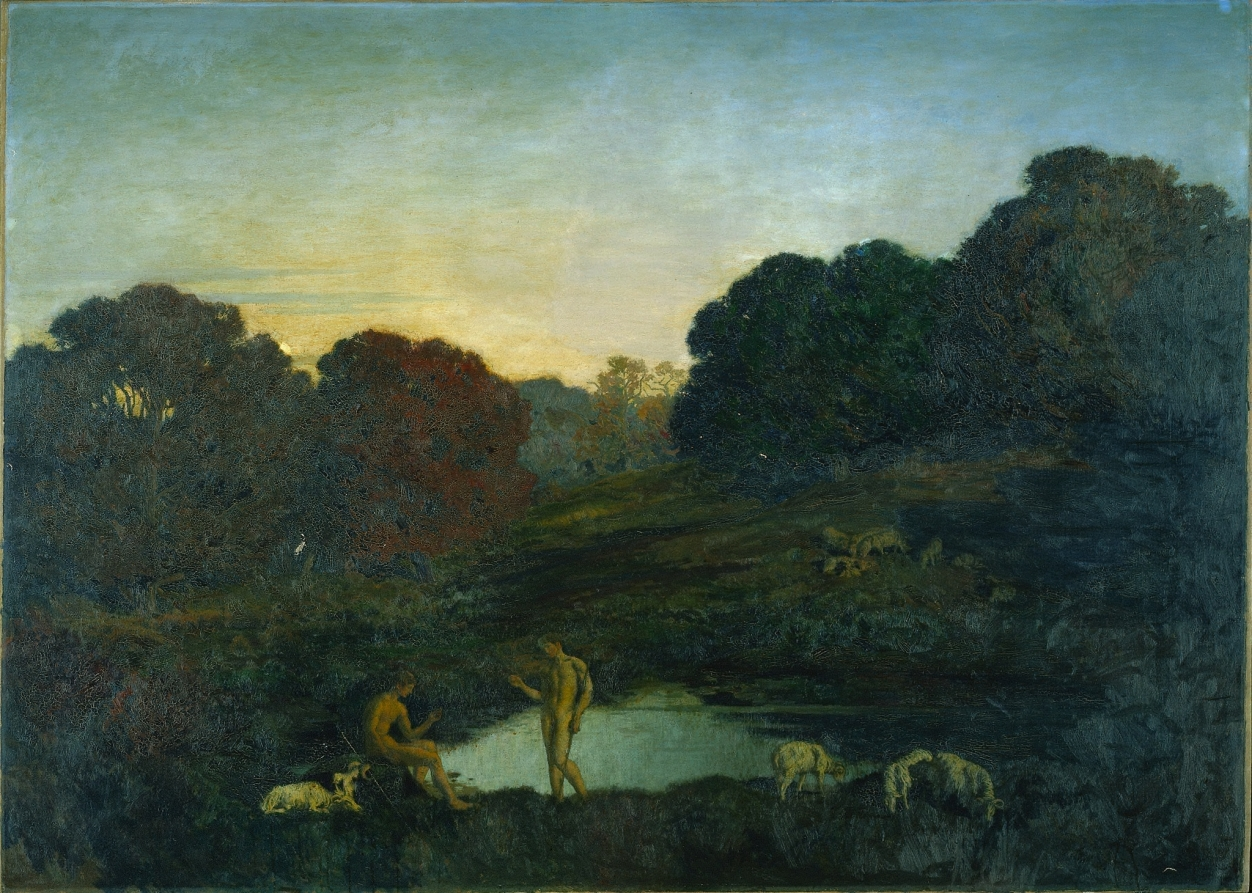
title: Pastoral Scene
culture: France, 20th century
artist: René Ménard (French, 1862–1930)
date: 1911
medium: oil on fabric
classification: Painting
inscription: Signed in lower right: E. R. Ménard 1911